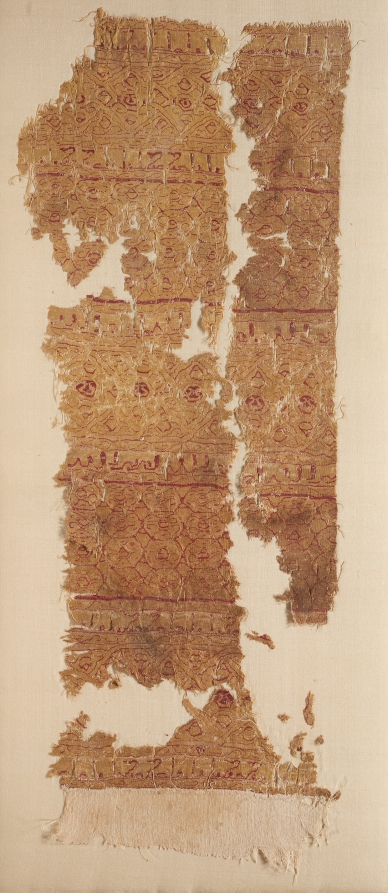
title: Tiraz with dense guilloche bands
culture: Egypt, Fatimid period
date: 1100s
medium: plain weave with inwoven tapestry weave: linen and silk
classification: Textile